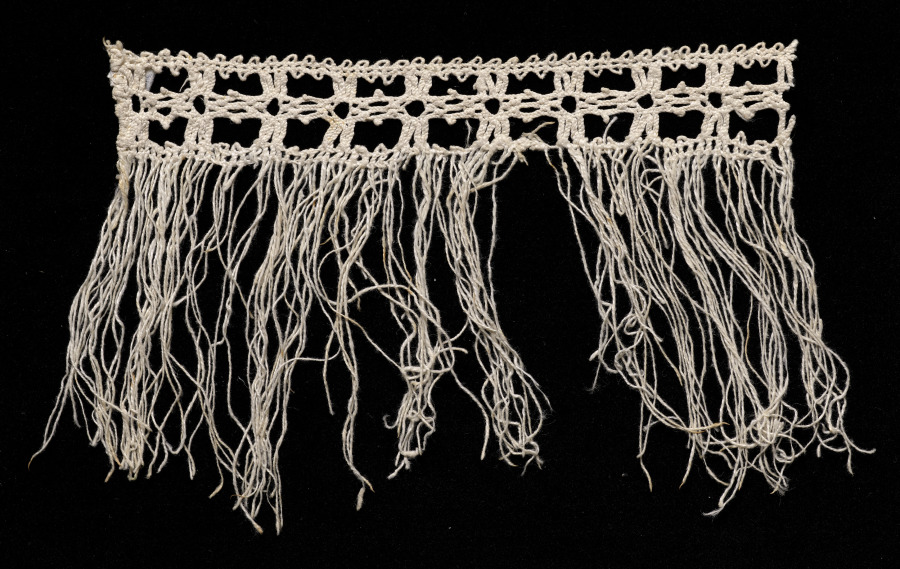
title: Lace Insertion with Fringe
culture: Italy, Venice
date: 1540–60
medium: Bobbin lace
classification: Lace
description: The design of this fringed bobbin lace fragment is like those for laces made of gold, silver, and colored silk threads.